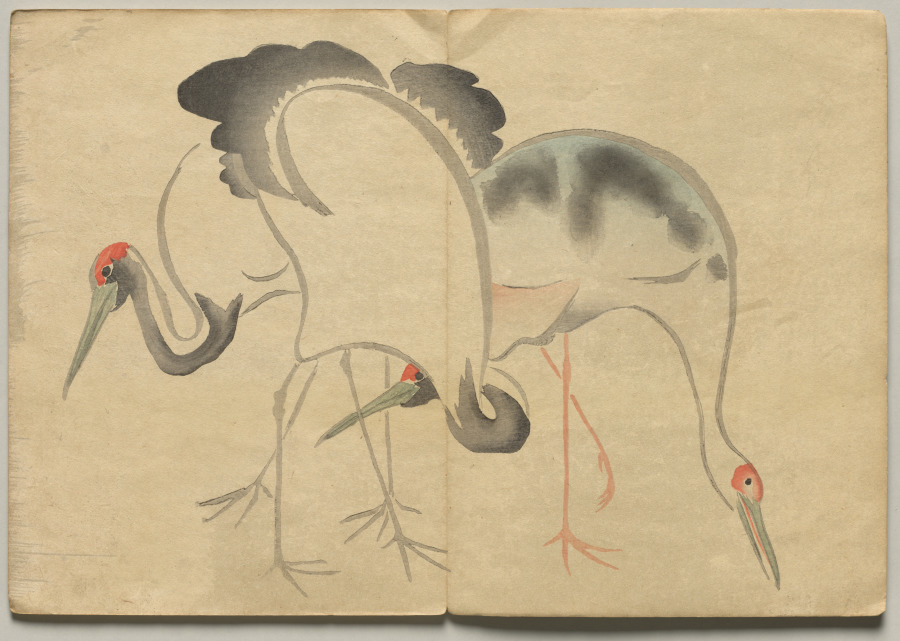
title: Scene from The Kōrin Picture Book (Volume 2)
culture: Japan, Edo period (1615–1868)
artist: Nakamura Hōchū (Japanese, d. 1819)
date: 1800s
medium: color woodblock printed book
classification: Bound Volume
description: Ogata Korin (1658-1716) was one of the most admired artists of Rimpa, or "decorative school painting." These books by the charming later-generation Rimpa artist Hochu record Korin's inventive designs.